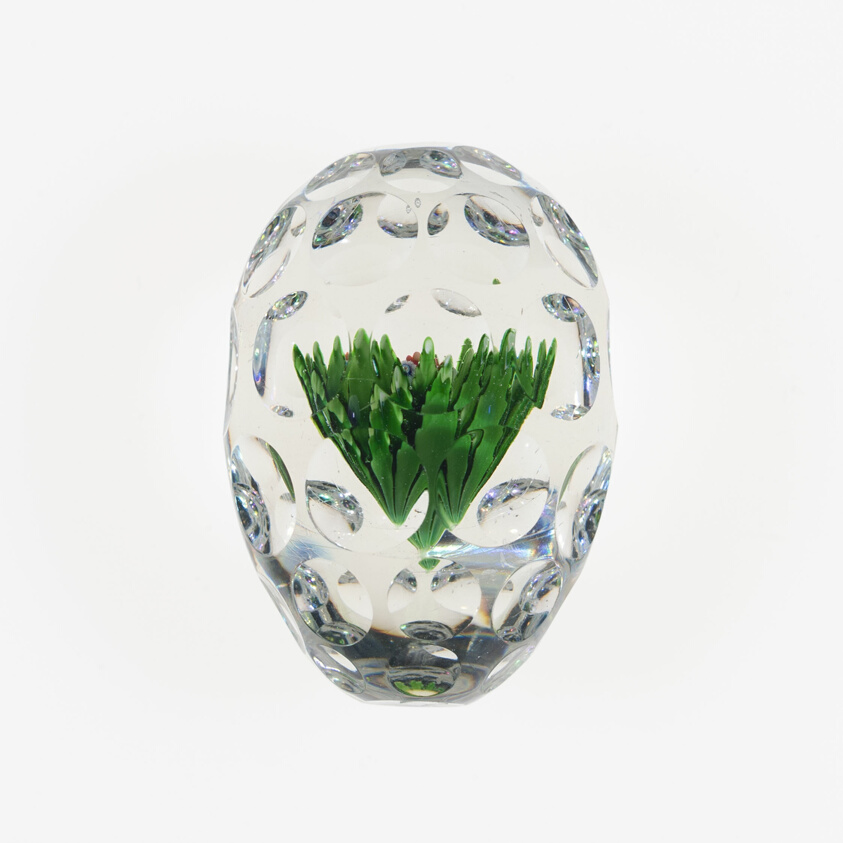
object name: Glass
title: Handcooler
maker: Saint-Louis Glassworks (Cristalleries de Saint-Louis); Lorraine, France, founded 1586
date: c. 1845–60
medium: Glass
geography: France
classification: paperweight; glass